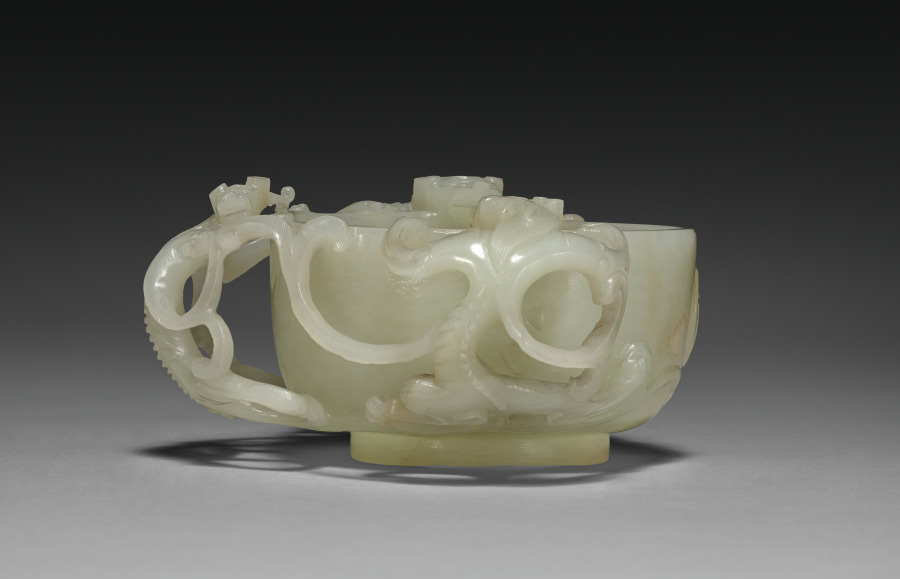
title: Cup with Dragon Handles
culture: China, Qing dynasty (1644-1911), Kangxi reign (1662-1722)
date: 1662–1722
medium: Pale gray-green white jade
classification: Jade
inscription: 萬壽長春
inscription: 壽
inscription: 子剛造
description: Three dragons, auspicious symbols for good fortune, grasp the rim of this bowl. A large shou (longevity) character is visible on the outside wall. Drinking cups with dragon handles were elite luxuries. The yellowish-white color and refined techniques are characteristic of Suzhou workshops that served the court, scholar-officials, and the merchant class. The optimistic attribution to Lu Zigang (late 1500s), a jade master recorded to have been active in Suzhou, suggests that its maker used the master’s name to attract wealthy clients eager to demonstrate their refined taste and connoisseurship.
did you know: Auspicious inscriptions on the base and front of the jade cup convey wishes for longevity.